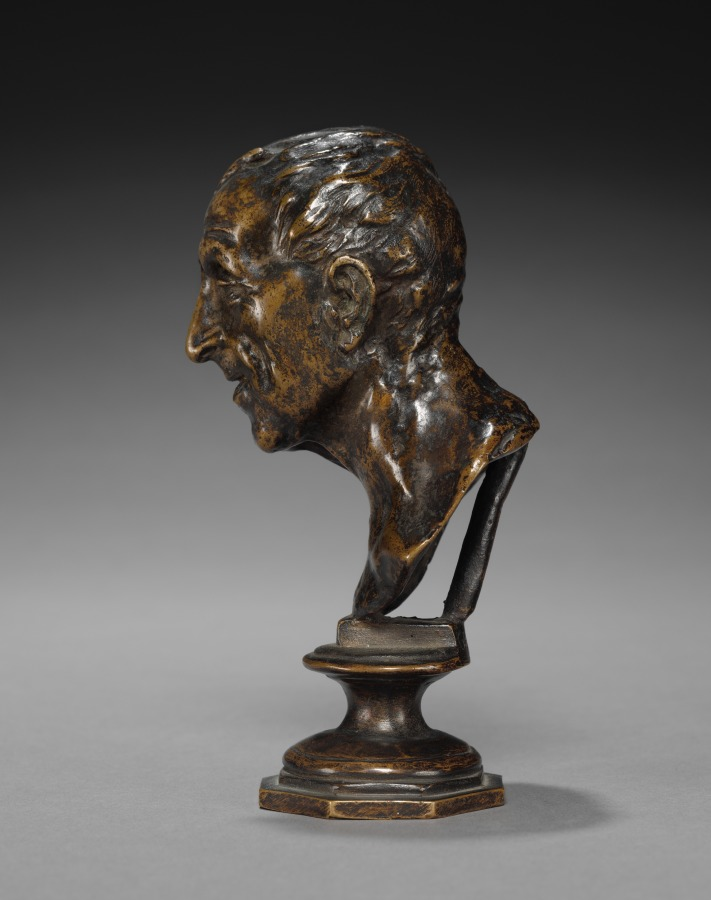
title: Head of a Man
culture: Italy, late 19th-early 20th century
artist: Vincenzo Gemito (Italian, 1852–1929)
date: c. 1875 – 1929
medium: bronze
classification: Sculpture